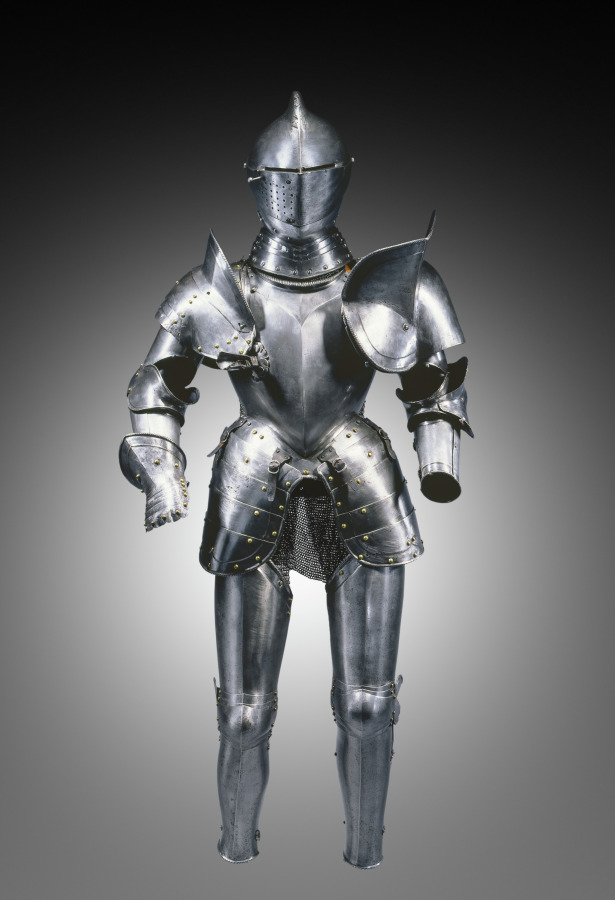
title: Tilting Suit (composed)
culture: South Germany, 16th century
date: c. 1560–80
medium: steel, leather straps, brass rivets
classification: Arms and Armor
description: This armor was developed for the joust-a sporting combat between two mounted contestants. Although all of the elements of this armor date from the same period, they are not all from the same suit. This armor is thus called "composed." It also shows the asymmetry of jousting armor. The participants rode along a wall-like barrier known as a "tilt" with their left sides facing one another. Consequently, armor on that side of the body had to be thicker. Note the large plate (grandguard) over the left shoulder for extra protection. Also, the breathing holes in the helmet were placed on the right side (farthest from an opponent's lance) to avoid injuries from splinters. The bracket attached to the right breastplate is called the lance-rest, a shock-absorbing support designed to accommodate the lance when "couched" under the right armpit.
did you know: Currently only the helmet of this suit is displayed in the museum's armor court; although both helmet and suit came into the collection together they do not belong together.